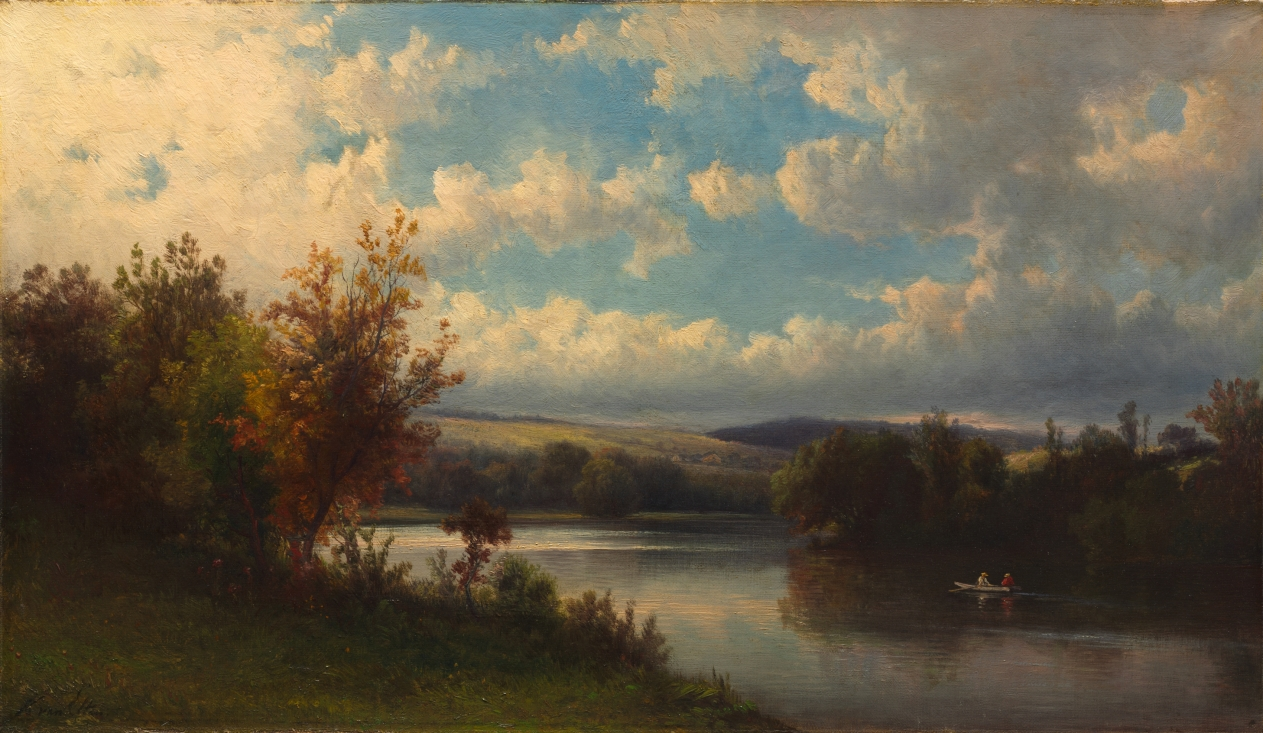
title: Landscape near Granby, Connecticut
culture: America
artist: Hendrik Dirk Kruseman van Elten (American, born The Netherlands, 1829–1904)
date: 1870s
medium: oil on canvas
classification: Painting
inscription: signed lower left: K. van Elten; graphite inscription on the bottom tacking margin at the left side: "Milford river"